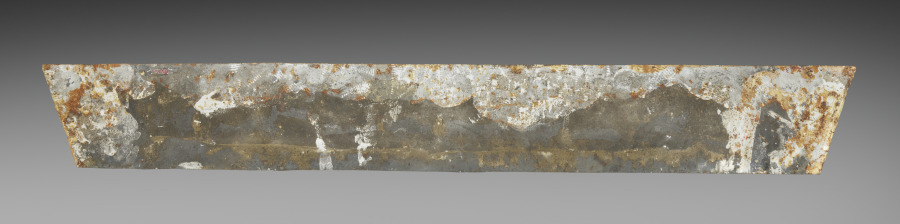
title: Set of Fire Linings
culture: France, style of Louis XVI, 18th Century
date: c. 1770–1780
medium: cast iron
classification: Furniture and woodwork